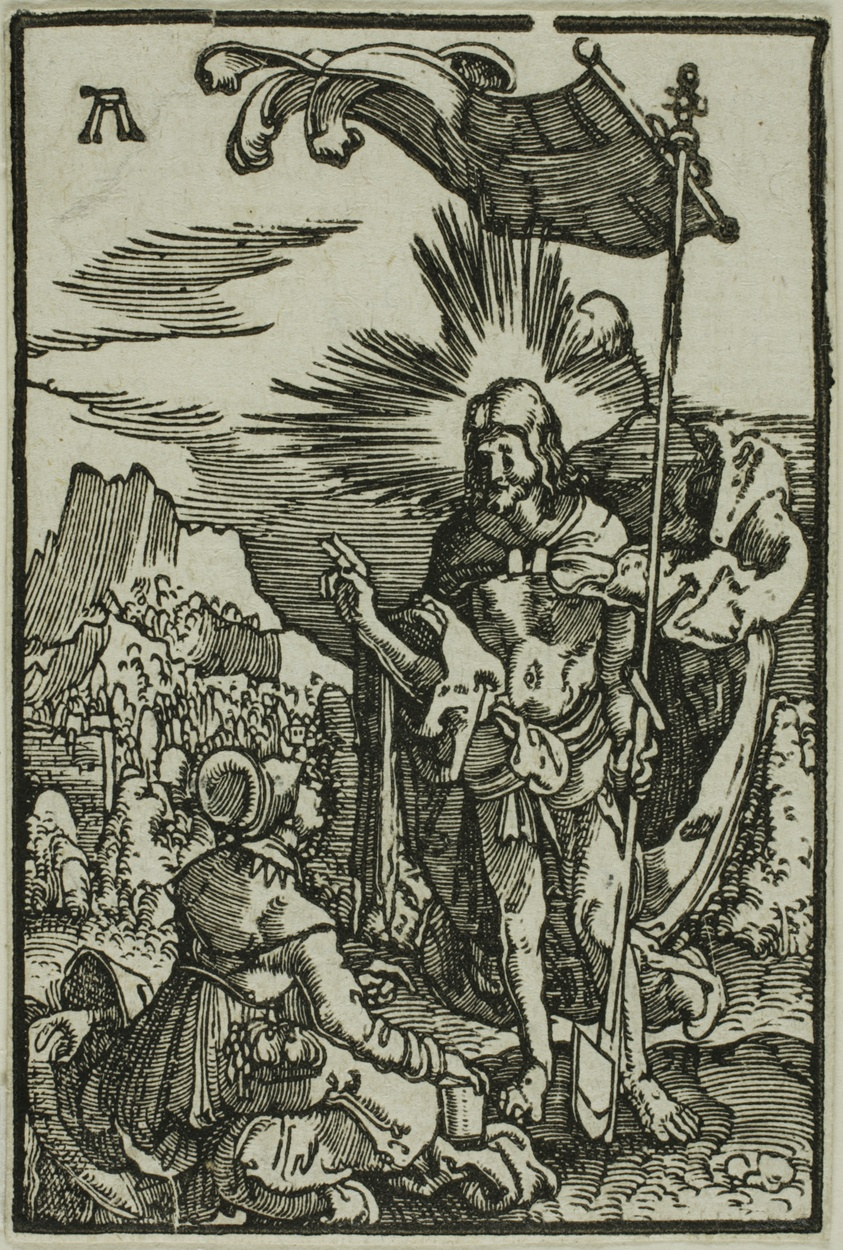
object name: Print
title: Christ Appears to the Magdalen, from The Fall and Redemption of Man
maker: Albrecht Altdorfer (German, c.1480-1538)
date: 1513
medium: Woodcut in black on ivory laid paper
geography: Germany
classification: woodcut; print; prints and drawing